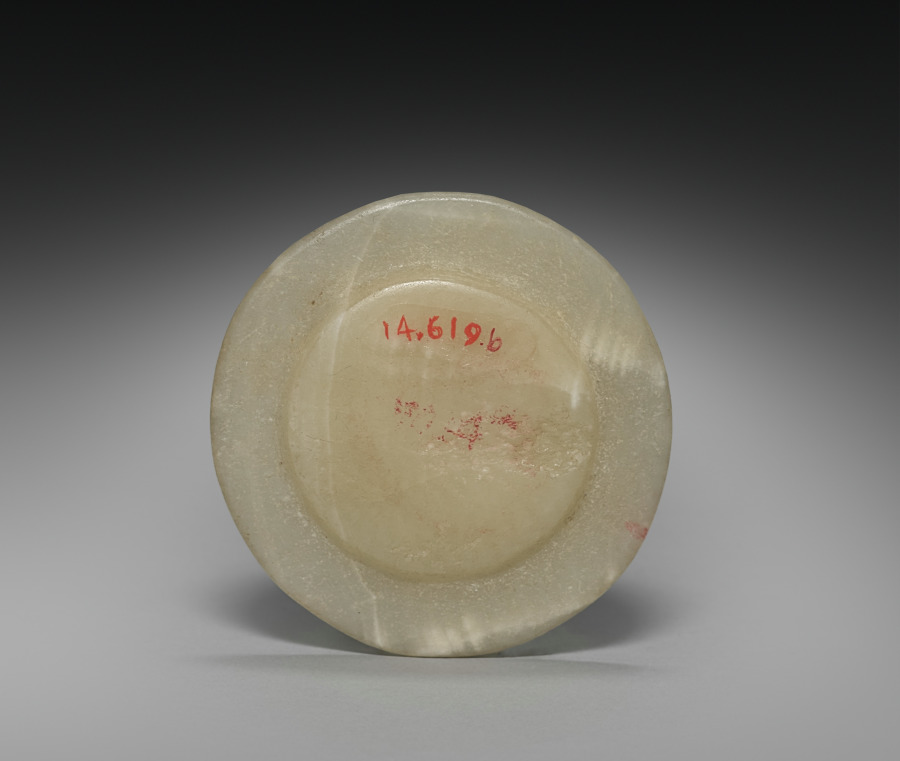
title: Long-Necked Flask with Lid (Lid)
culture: Egypt, New Kingdom (1540–1069 BCE), Dynasty 18, reign of Tuthmosis III (1479–1425 BCE)–reign of Amenhotep III (1390–1352 BCE)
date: 1401–1353 BCE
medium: travertine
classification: Vessels